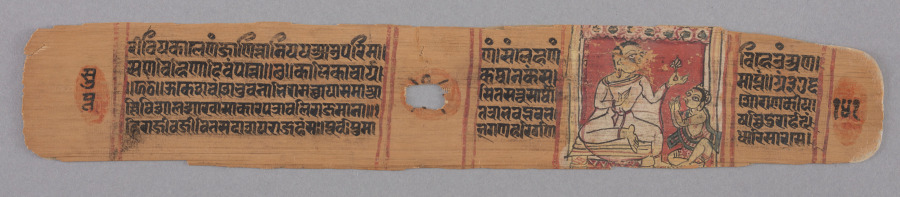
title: Monk Holding a Flower Venerated by a Lay Disciple: Folio 141 (verso), from a Kalpa-sutra and Story of Kalakacharya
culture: Western India, Gujarat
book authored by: Devachandra (Indian)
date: 1287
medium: Gum tempera and ink on palm leaf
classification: Painting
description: Palm leaf was the preferred material for sacred texts before the 1400s in India. The text here was often appended to the Kalpa-sutra, the most sacred book of Jainism. This story concerns the life of a Jain teacher named Kalaka, a prince who developed the ability to work magic after he become a monk, inspired by the teachings of a holy man. The painting on this page shows a monk clad in white, indicating his affiliation with the Shvetambara (“white clad”) branch of Jainism. It is the second to the last page of the manuscript and includes the beginning of the colophon, which contains information about when and where this manuscript was produced.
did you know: The colophon begins on this page; the next page contains the date when the manuscript was written.